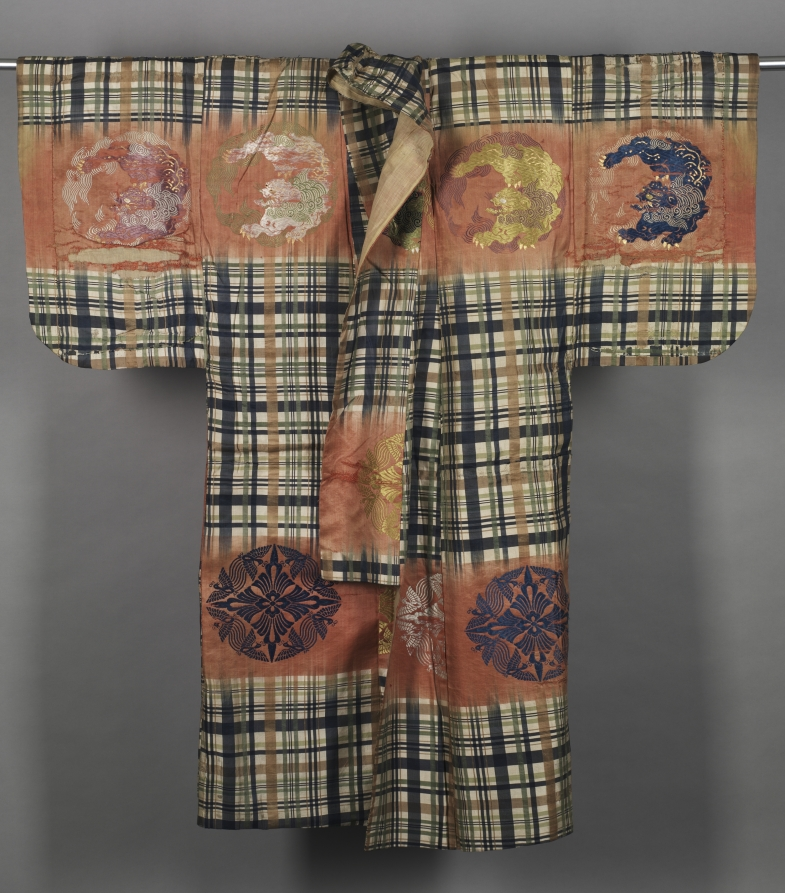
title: Noh Costume (Atsuita)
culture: Japan, Edo period (1615–1868)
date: 1800–1850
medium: Silk: twill weave with supplementary weft, brocaded; metal thread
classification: Garment